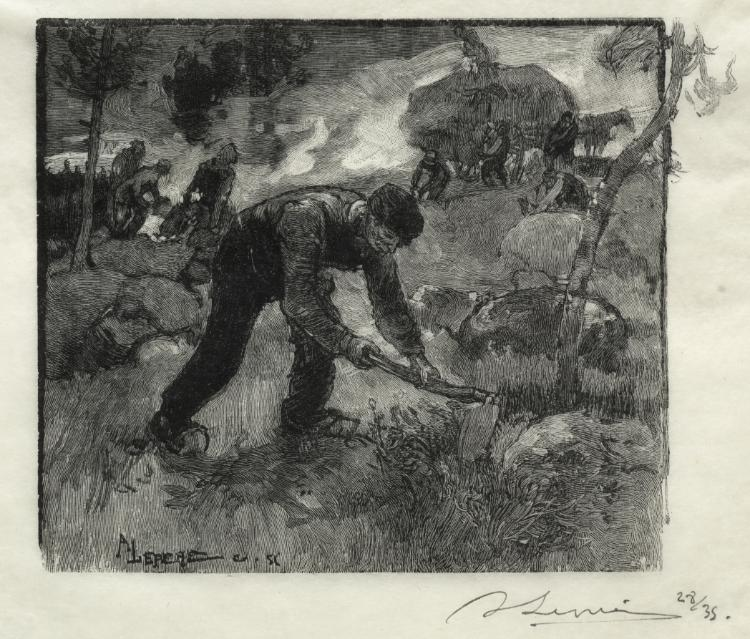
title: Arracheurs de bruyères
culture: France, 19th century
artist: Auguste Louis Lepère (French, 1849–1918)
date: 1887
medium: wood engraving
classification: Print